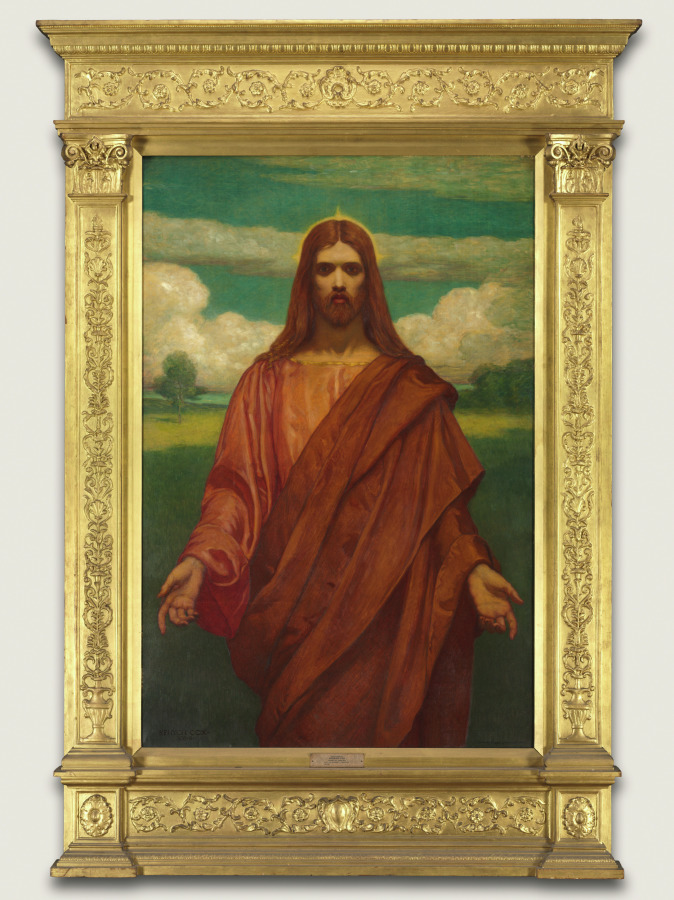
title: Christ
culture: America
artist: Kenyon Cox (American, 1856–1919)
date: 1905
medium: oil on canvas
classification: Painting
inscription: Signed lower left corner "Kenyon Cox 1905-6-" and lower right corner "copyright 1906 by Kenyon Cox"